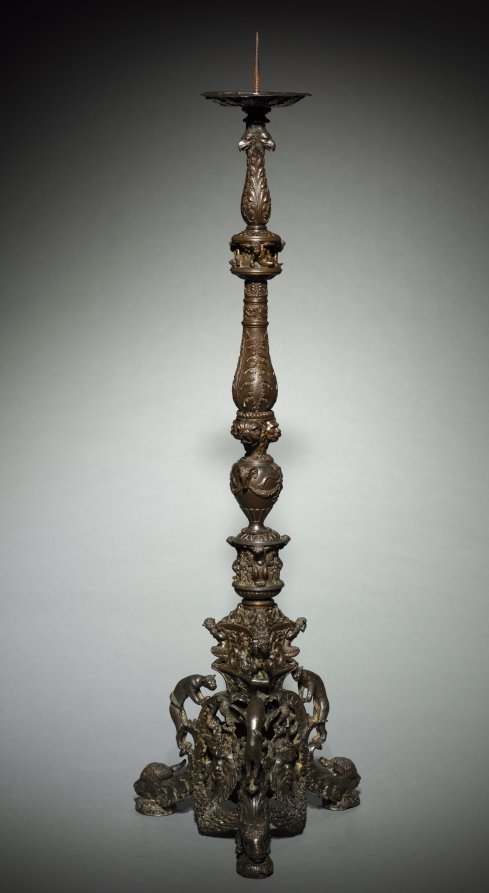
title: Paschal Candlestick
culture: Northern Italy, possibly Padua, 16th century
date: c. 1525–1550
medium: bronze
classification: Sculpture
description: In Roman Catholic practice, a large candlestick holds the Paschal Candle, blessed and lit for the first time on Easter eve, then used on significant occasions throughout the year. Despite its religious function, the decorations here are entirely secular-ranging from panthers and bound satyrs to the heads of raptors and goats. These elements derive from ancient Roman sculpture and were especially popular among intellectuals in northern Italy, who were actively exploring connections among pagan traditions, ancient philosophy, and Christianity.